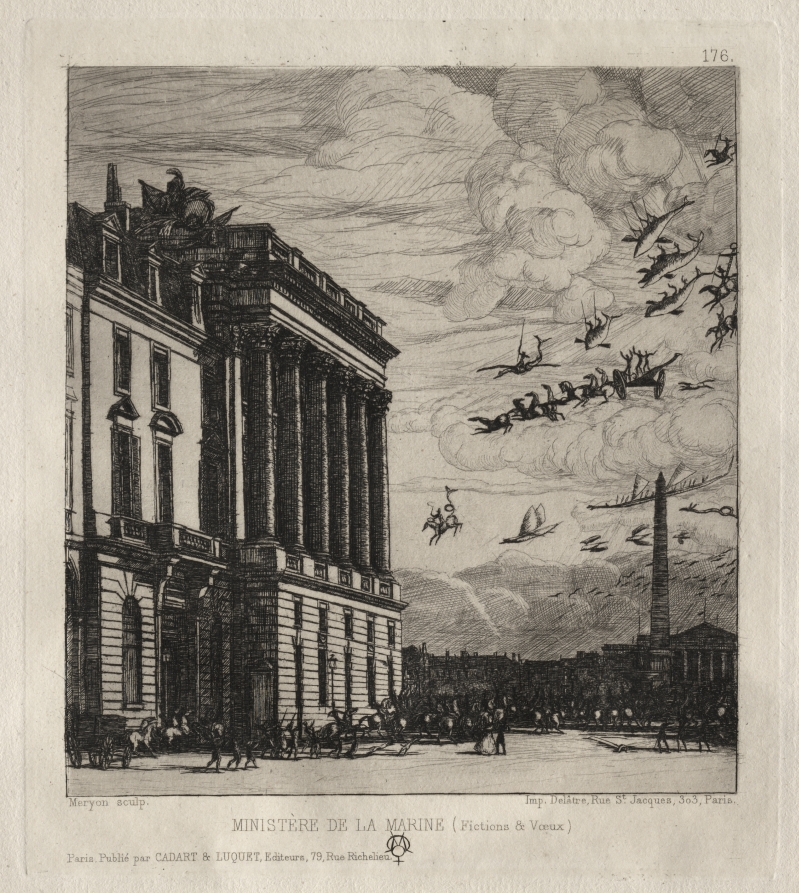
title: The Admiralty, Paris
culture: France, 19th century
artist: Charles Meryon (French, 1821–1868)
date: 1865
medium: etching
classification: Print